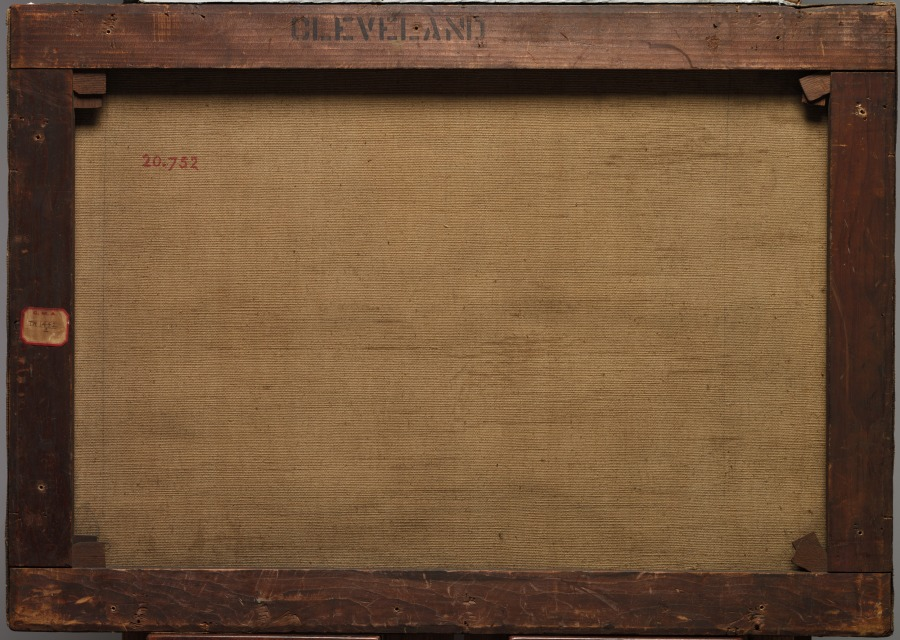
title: Japanese Boy Building a Man-of-War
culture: America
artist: J. C. Arter (American, 1859–1923)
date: 1895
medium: oil on canvas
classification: Painting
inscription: signed lower left: J. C. Arter / Hyozo / Japan 95